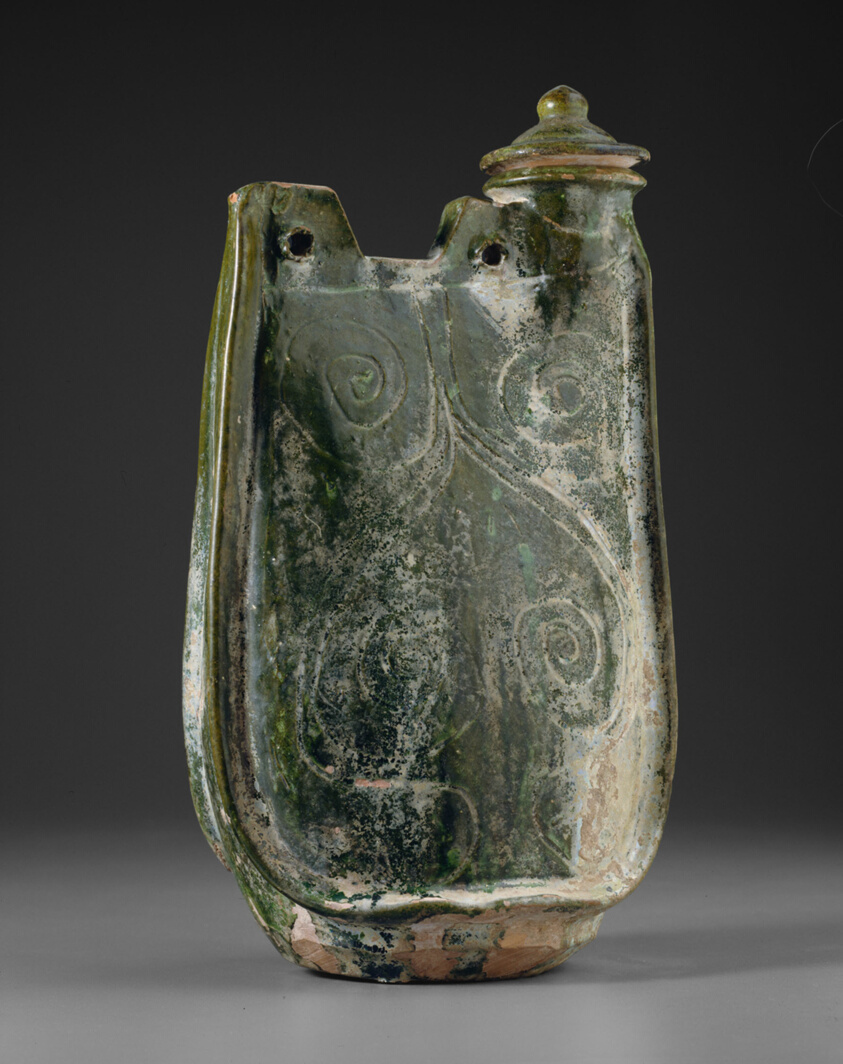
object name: Vessel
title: Covered Pilgrim Flask with Scrolls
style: Chinese (culture or style)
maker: China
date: Liao dynasty (907–1124), 11th century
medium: Stoneware with lead glaze and underglaze incised decoration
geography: China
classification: stoneware; ceramics; asian art; vessel